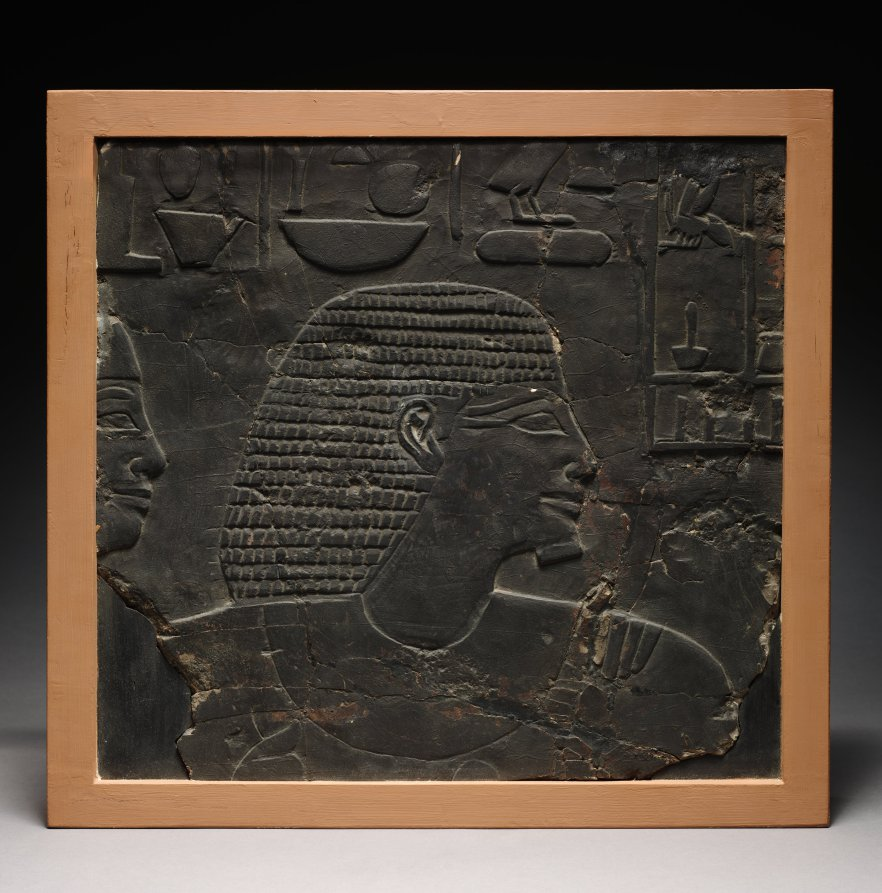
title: Fragment of a Tomb Relief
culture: Egypt, probably Thebes, New Kingdom (1540–1069 BCE), Dynasty 18, reign of Tuthmosis II (1493–1479 BCE) or later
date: 1401–1391 BCE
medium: limestone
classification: Sculpture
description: In later ages tombs must have served as dwelling places for peasants, since the walls became completely blackened with soot. This fragment is from the most common type of Egyptian tomb scene: the deceased and his wife seated at the funeral banquet of at an offering table.